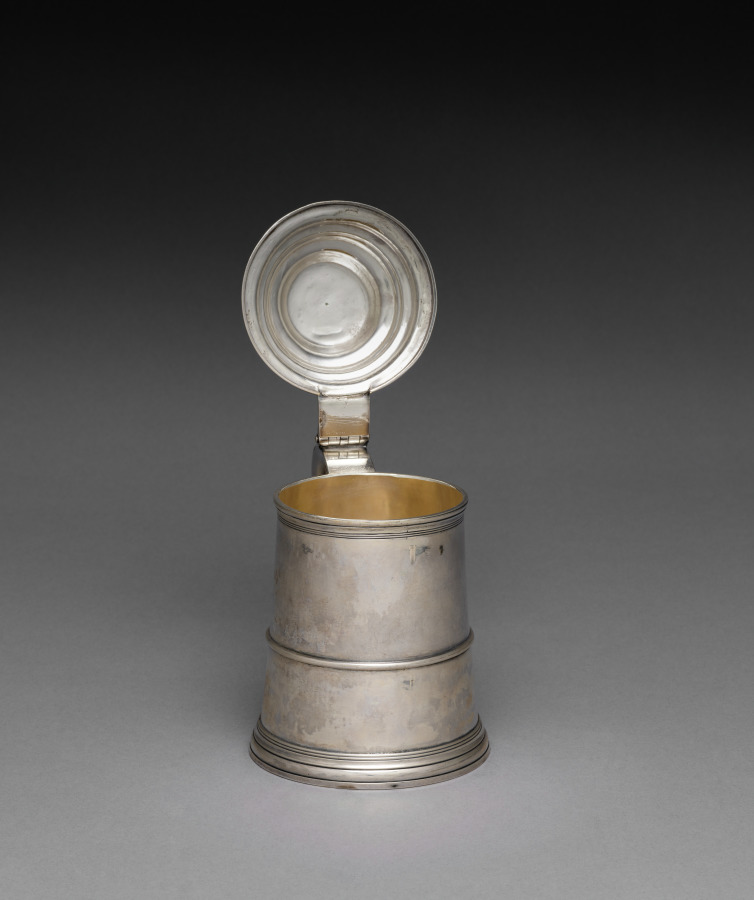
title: Tankard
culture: America, Massachusetts, Boston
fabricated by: John Coverly (American, 1800)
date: c. 1760–80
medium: silver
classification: Silver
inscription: Engraved on handle: "P" over "I * H".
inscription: Stamped on lid: "Coverly"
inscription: Stamped underside: "I.COVERLY".